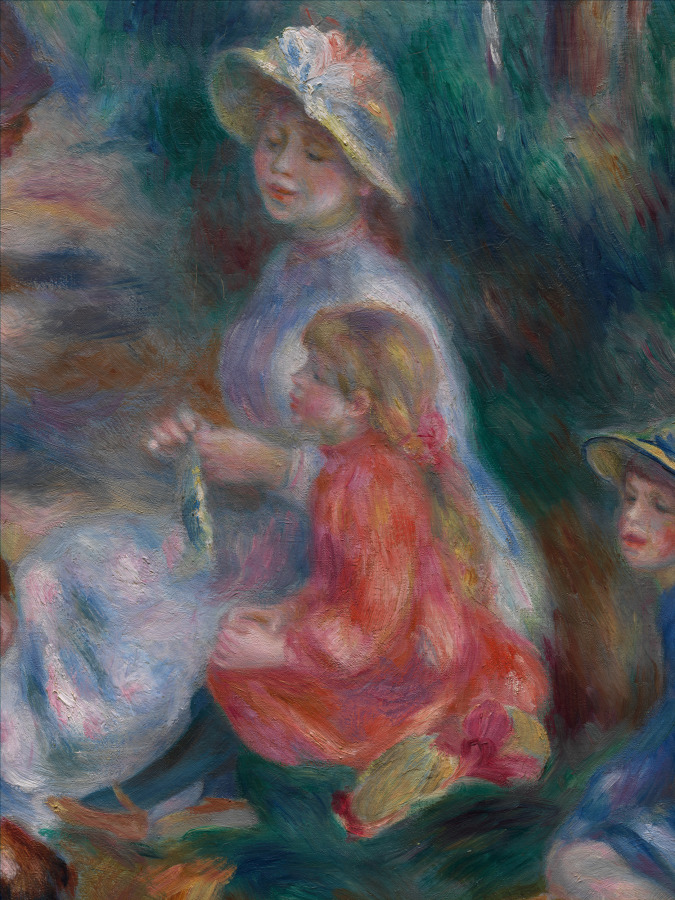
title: The Apple Seller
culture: France, 19th century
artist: Pierre-Auguste Renoir (French, 1841–1919)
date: c. 1890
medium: oil on fabric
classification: Painting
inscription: Signed center right: a. renoir / 1864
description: This painting depicts a young country girl offering apples to Renoir's wife, Aline. The boy in the straw hat may be the artist's nephew, Edmond, but the young girl with the ribbon in her hair has not been identified. Bathed in soft, dappled sunlight, the figures are united through the fluid brushstrokes that cover the canvas. The leaping dog provides an accent of humor and motion in an otherwise tranquil scene. The picture was probably completed at Essoyes, in eastern France.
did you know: Using repetitive, soft, light-of-touch brushstrokes to form patches of color, Renoir creates a sense of dappled light that reflects on the ground and caresses the figures, giving the painting an ethereal, dreamlike quality.